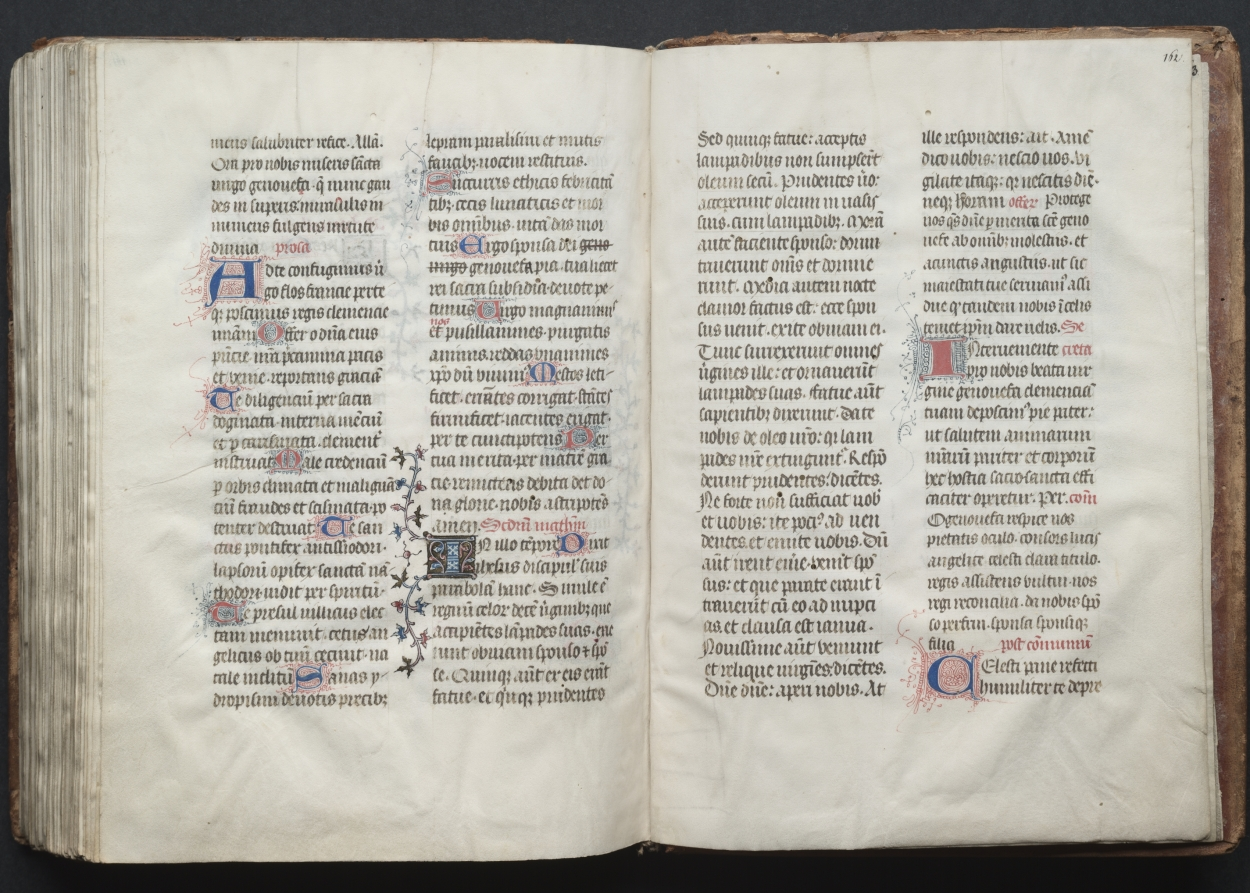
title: The Gotha Missal: Fol. 161v, Text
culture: France, Paris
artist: Master of the Boqueteaux (French)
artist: and Workshop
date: c. 1375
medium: ink, tempera, and gold on vellum; blind-tooled leather binding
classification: Bound Volume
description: The style and quality of this manuscript's decoration is typical of deluxe Parisian books made for aristocratic or royal patrons. Most of the book's decoration appears to be the work of the Master of the Boqueteaux, an artist active at the court of King Charles V (died 1380). His style was apparently shared by a number of book illuminators working in and around Paris. It is very possible that the Gotha Missal belonged to Charles V, but is not provable because the manuscript has no royal portraits and lacks a colophon. Given the book's magnificent decoration, however, it would seem that it was produced for a Valois prince, if not for the king himself. The manuscript receives its name from the German dukes of Gotha, its later owners.